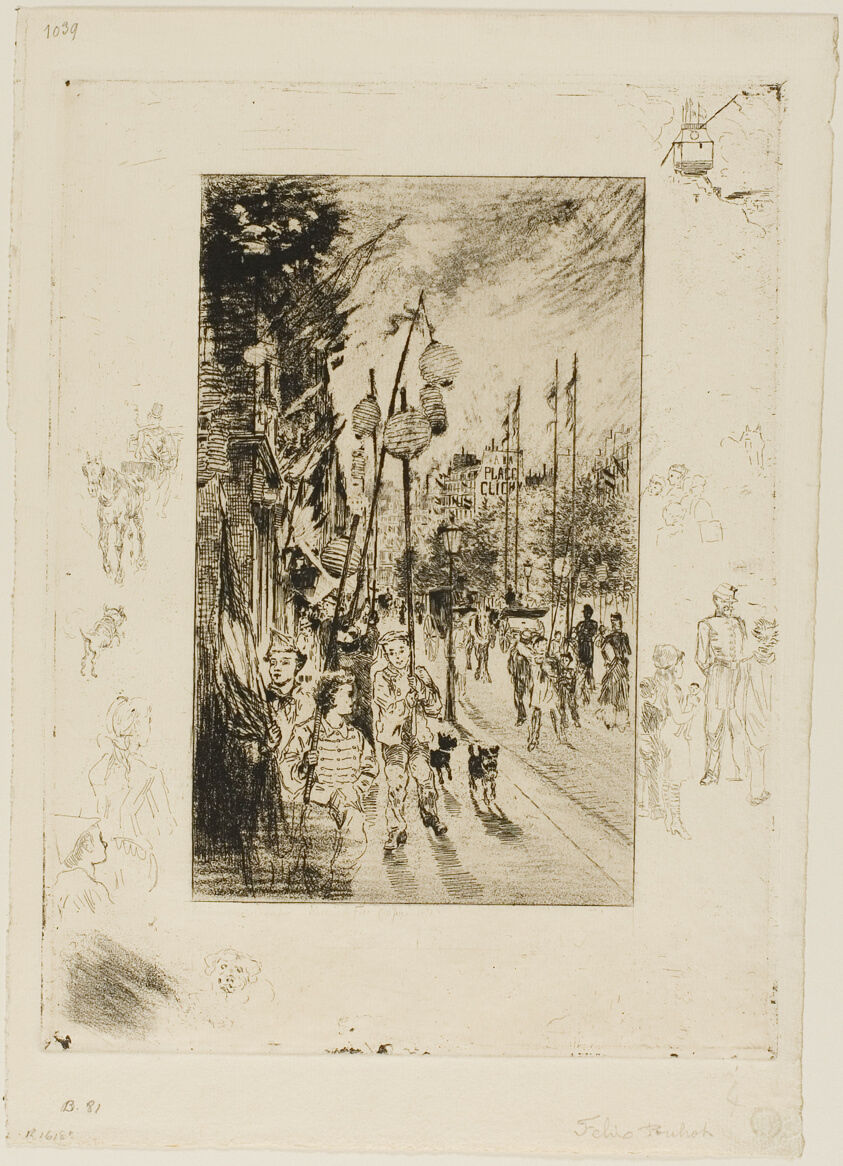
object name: Print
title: National Holiday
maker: Félix Hilaire Buhot (French, 1847-1898)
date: c. 1878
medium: Etching on ivory laid paper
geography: France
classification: etching; print; prints and drawing